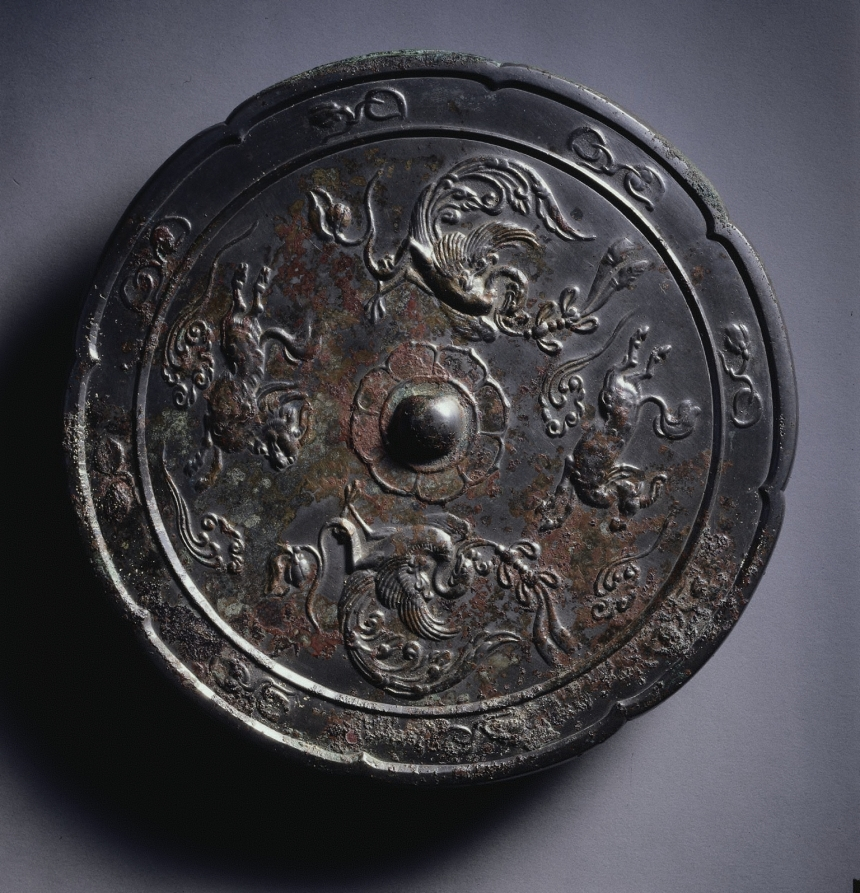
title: Lobed Mirror with Paired Phoenixes and Auspicious Animals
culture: China, Tang dynasty (618-907)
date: 700s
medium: bronze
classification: Metalwork